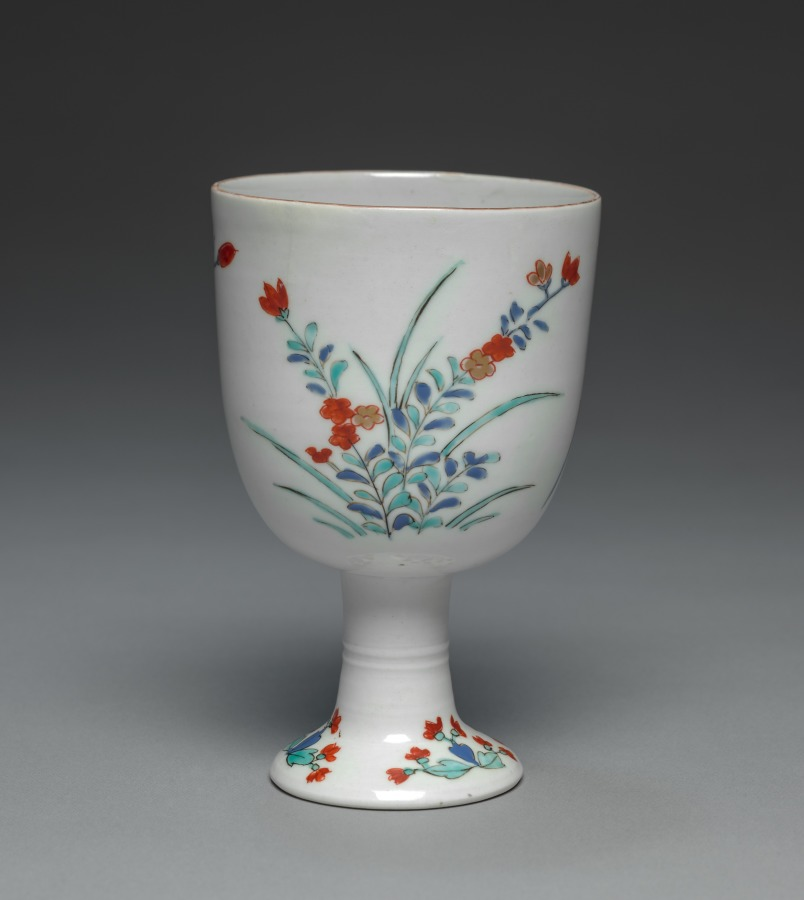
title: Goblet with Flowers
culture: Japan, Edo period (1615–1868)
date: c. 1700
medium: porcelain with overglaze color enamel and gold (Hizen ware Ko-Imari style)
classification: Ceramic